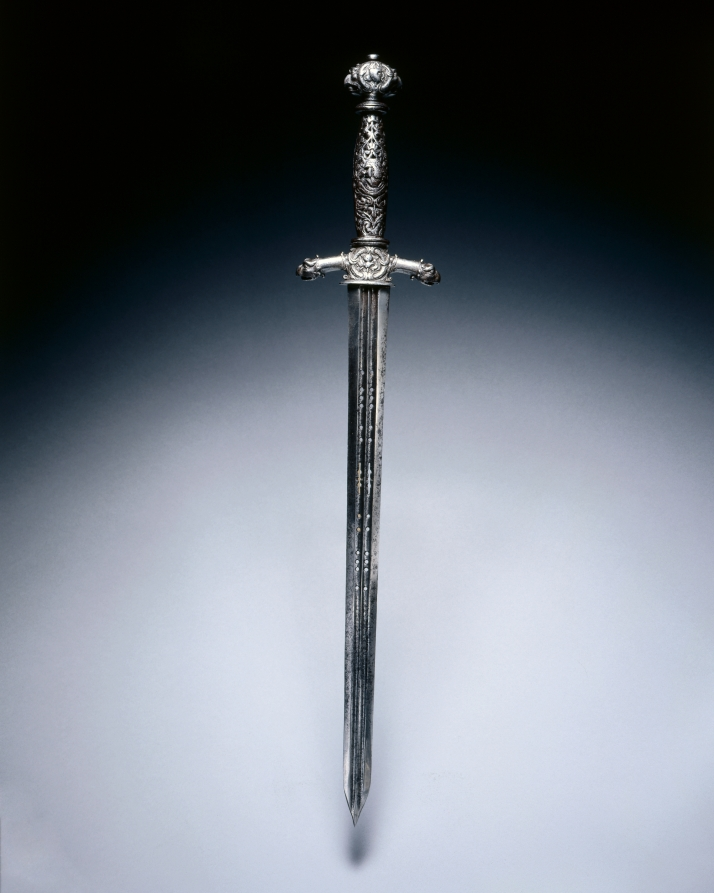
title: Dagger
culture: Italy, early 17th century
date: early 1600s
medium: steel, perforated blade; openwork grip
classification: Arms and Armor